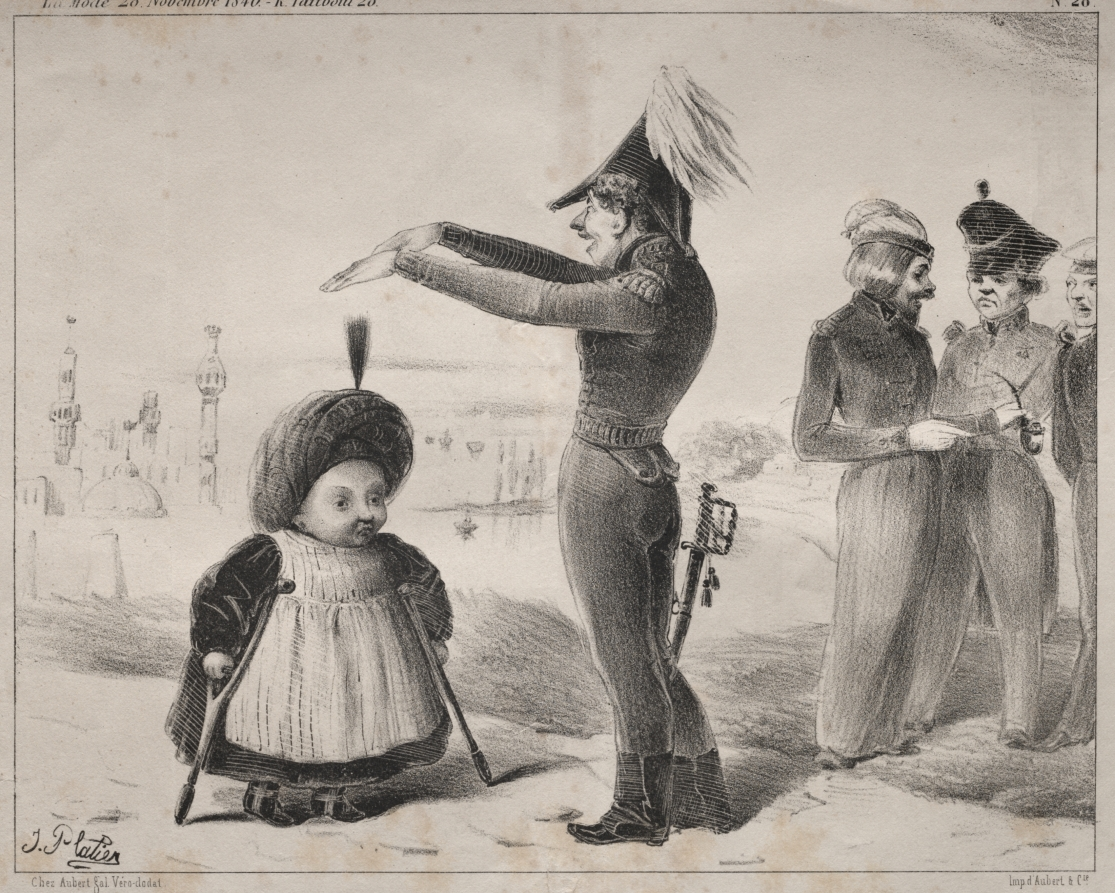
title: Laissez venir à moi les petits enfants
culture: France, 19th century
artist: Jules Platier (French)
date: 1840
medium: lithograph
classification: Print